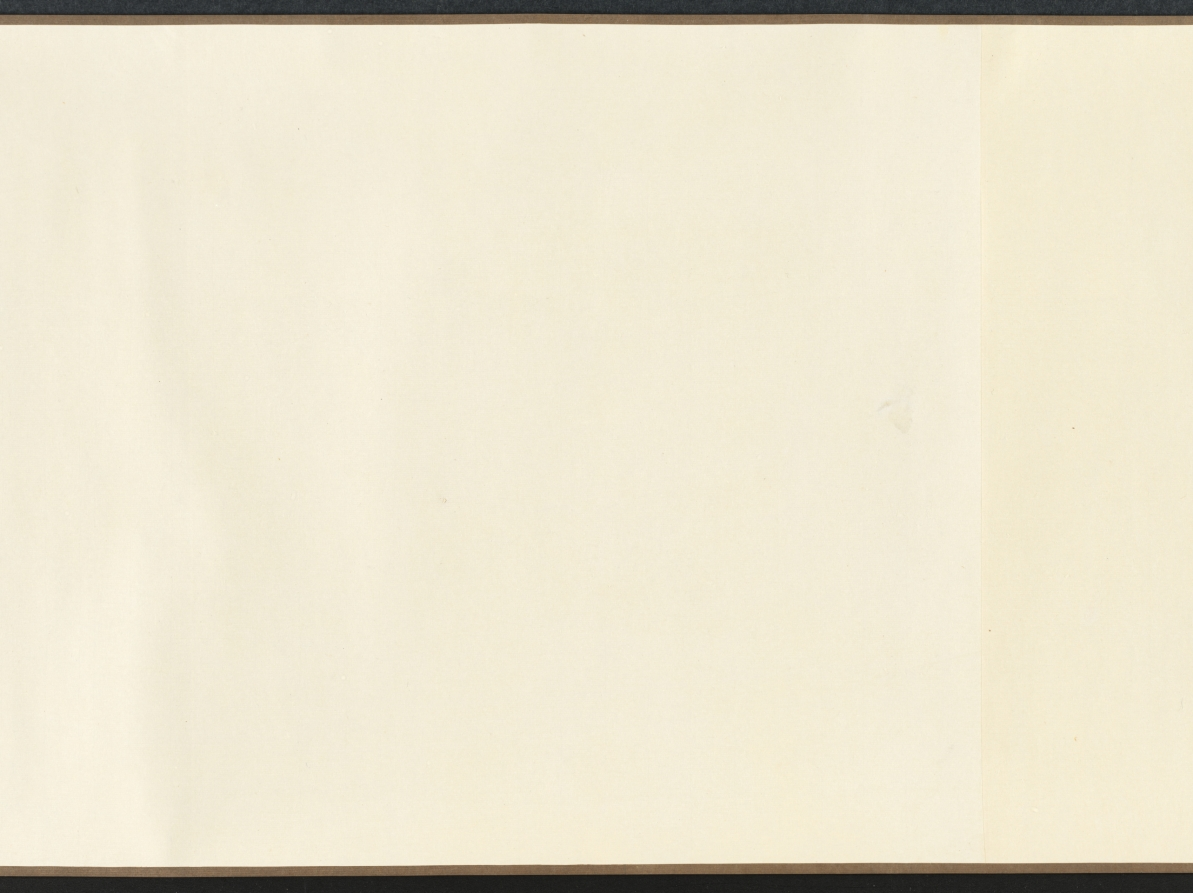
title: Ink Flowers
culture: China, Yuan dynasty (1271-1368)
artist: Zhao Zhong (Chinese, second half of the 1300s)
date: 1361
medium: Handscroll; ink on paper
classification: Painting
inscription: 寶帶同心結，香羅合歡扇。/ 繡作錦鴛鴦，雙雙為君獻。/ 薔薇露灑熏籠衣，馨香奉君君勿違。 原初并題。 [印] 趙衷原初畫記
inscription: 翠袂素羅韈，玉臺黃金盃。浩歌渡弱水。天風卷海三山開，麻姑方平為招飲，蛟宮獻舞銀濤堆。 原初并題。 [印] 雲林清趣、[印] 趙衷原初畫記。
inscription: 右用湯叔雅慶元中所寫墨花法作此卷，又效李長吉體賦詩以題之。詩與畫雖未工，要皆出於古人之餘，譬猶欲成方圓而必求其規矩之用也，識者毋誚焉！至正辛丑八月望日，東吳野人趙衷原初謹識。 [印] 趙原初、[印] 傳世清玩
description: Zhao Zhong's flowers, each paired with a poem, echo the fine-style colored flowers of the academic tradition, but instead he used only ink. Fine lines define the contours of each plant, as well as the veins within each petal and leaf. Careful ink washes give subtle modeling to the forms. The combination of lily, narcissus, and peony is unusual as the three belong to no known seasonal or symbolic system popular in the fourteenth century. Zhao’s medical training may have influenced the selection. Powdered lilies, for example, were prescribed to dispel grief, while the bark of tree peony roots was used as a treatment for various blood disorders.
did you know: This handscroll is a very rare example of ink flowers in the linear baimiao style of the fourteenth century.